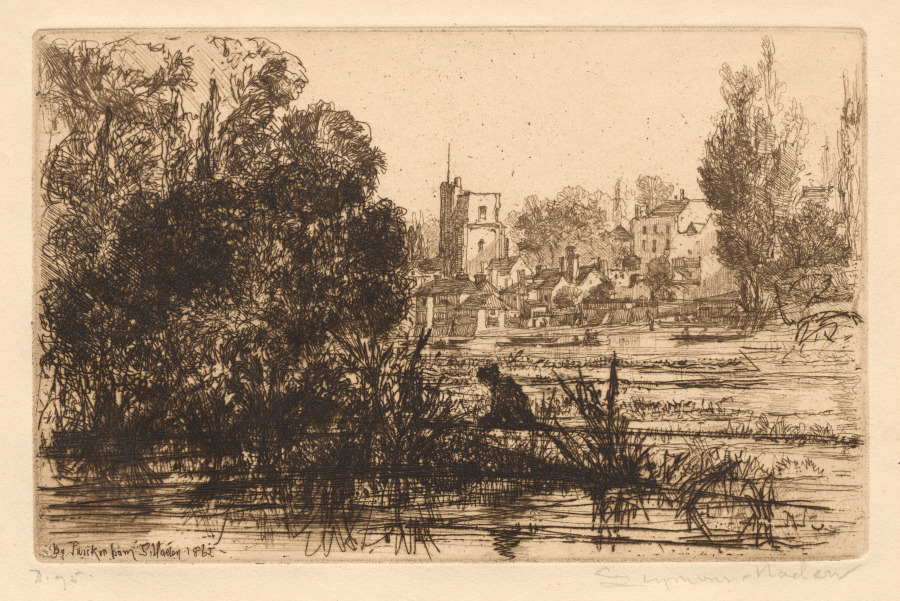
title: Hamerton's Portfolio III: Twickenham Church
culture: England, 19th century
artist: Francis Seymour Haden (British, 1818–1910)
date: 1865–72 (published 1872)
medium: etching and drypoint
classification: Print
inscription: Lower right, in graphite: Seymour Haden; lower left in graphite: D 75? Etched in plate, lower left: By Twickenham S Haden, 1865 Lower right, in graphite: Seymour Haden; lower left, in graphite: D. 75?